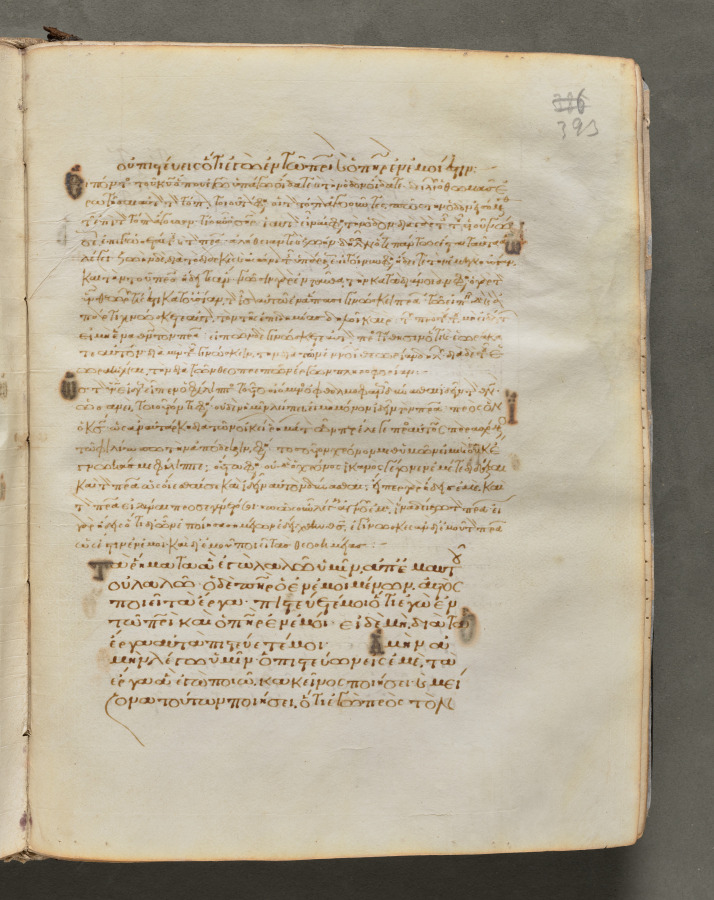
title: Text, folio 393 (recto), from a Gospel Book with Commentaries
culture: Byzantium, Constantinople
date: c. 1000–1100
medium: ink, tempera, and gold on vellum; leather binding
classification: Bound Volume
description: Each of the four gospels in this book opens on a page with brilliantly illuminated borders depicting the author of the text as well as birds—principally peacocks, symbols of the immortality of the soul—and fountains, representing the fountain of life and the salvation of the soul. This volume consists of 428 leaves with texts in Greek. Its level of sophistication suggests that it was probably written and decorated in a monastery in Constantinople.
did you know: Gospel books were carried in procession through Byzantine churches.